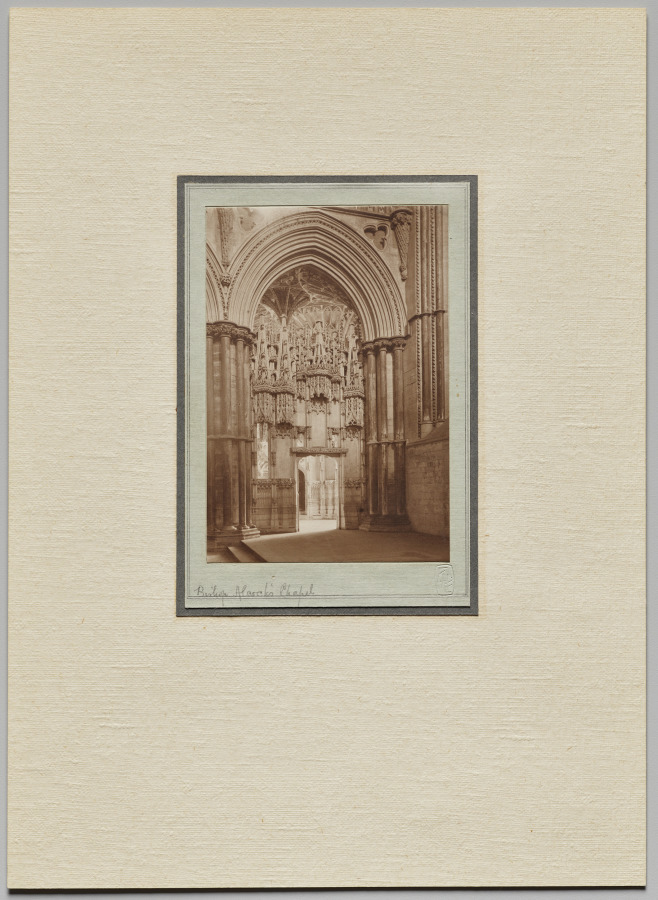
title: Bishop Alcock's Chapel from Reho-Choir, Ely Cathedral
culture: England, 19th century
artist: Frederick H. Evans (British, 1853–1943)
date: 1897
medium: platinum print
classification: Photograph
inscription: Written in pencil on recto of primary mount: “Bishop Alcock’s Chapel”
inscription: Embossed in lower right on recto of primary mount: “FHE”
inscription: Ex-Libris plate adhered to verso of tertiary mount: “Ex Libris/Frederick H. Evans/Let those who/hold the torch/hand it on to/others”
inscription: Written in pencil on verso: “ELY CATHEDRAL”